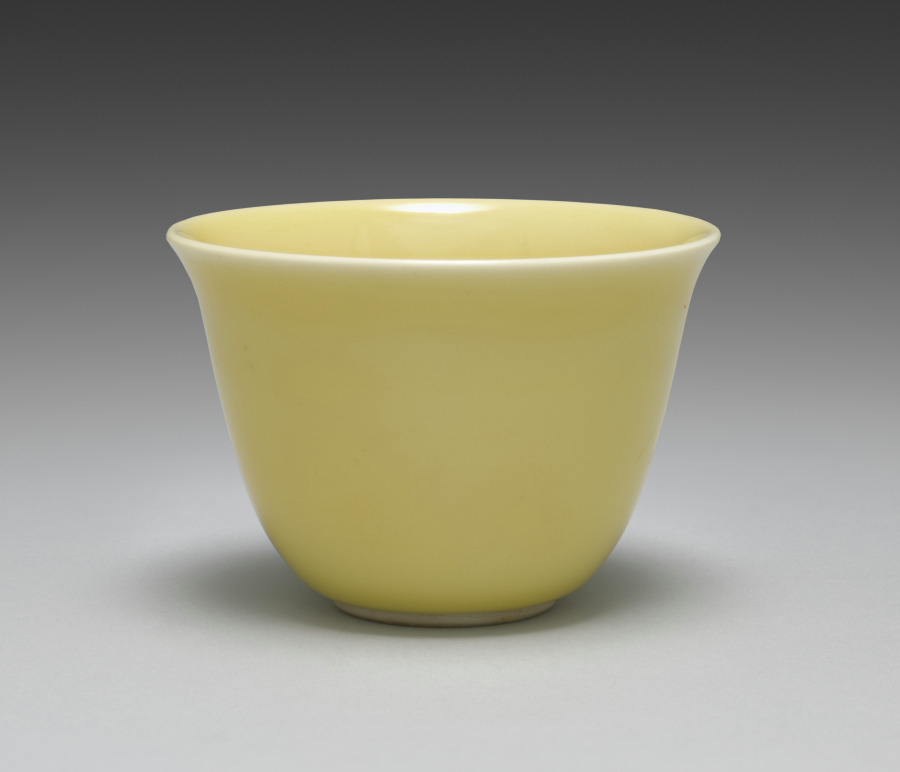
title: Cup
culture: Japan, Taishō period (1912–26) or Shōwa period (1926–89)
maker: Seifū Yohei IV (Japanese, 1872–1951)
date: 1914–46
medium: porcelain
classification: Ceramic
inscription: 清風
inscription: 清風造 【印】成山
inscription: 清風盧人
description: Like his father, Yohei IV also produced works with red or yellow monochrome glazes. His yellow-glazed works include this set of five drinking cups, a pair of sake pourers CMA 2022.216, and a sweets bowl molded into the shape of a chrysanthemum CMA 2022.218.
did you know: Seifū Yohei IV learned the ceramics industry from his father and painting from Tanomura Shosai.